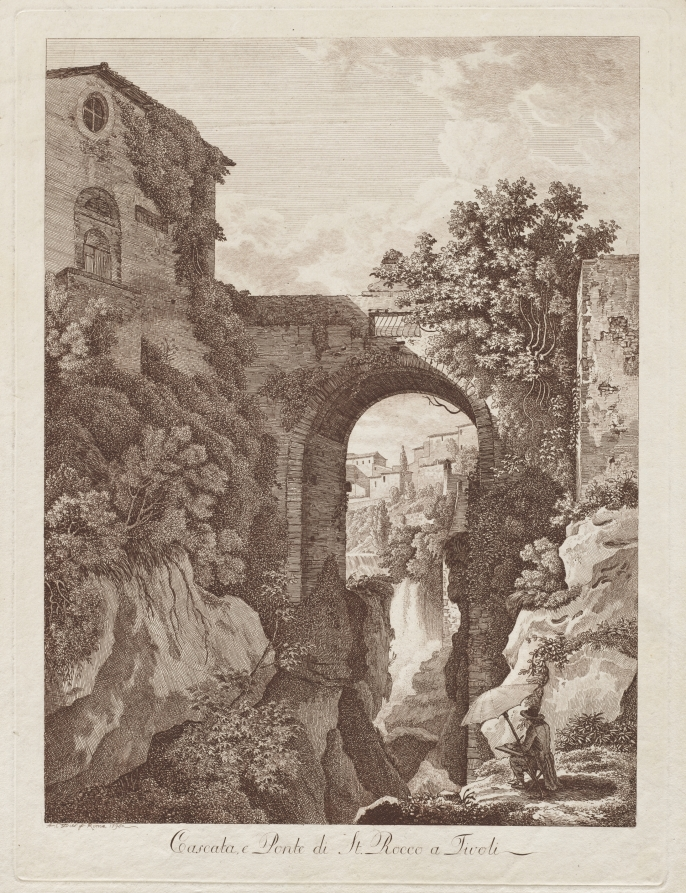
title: St. Rocco Waterfall and Bridge at Tivoli (Cascata e Ponte di St. Rocco a Tivoli)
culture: Austria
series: Presumably from Mahlerischradirte Prospecte von Italien (a set of 72 etchings published by Frauenholtz, Mexhau, Dies, and Reinhart, each contributed 24 plates)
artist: Albert Christoph Dies (Austrian, 1755–1822)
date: 1795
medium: etching in brown ink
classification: Print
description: Throughout the latter part of the 18th century, successive generations of German artists visited Italy in order to study the acknowledged masterpieces of antiquity and the Renaissance. After an unsatisfactory initial course of study of printmaking in Basel, Dies set out on foot to Rome where he remained for twenty years working as a painter and etcher. This etching of an artist sketching a picturesque view at Tivoli came from a series of Italian views. Although at the time Dies’s work was criticized for being executed too freely, this composition articulates the Romantic landscapist’s bond with nature that dominated 19th-century German art.